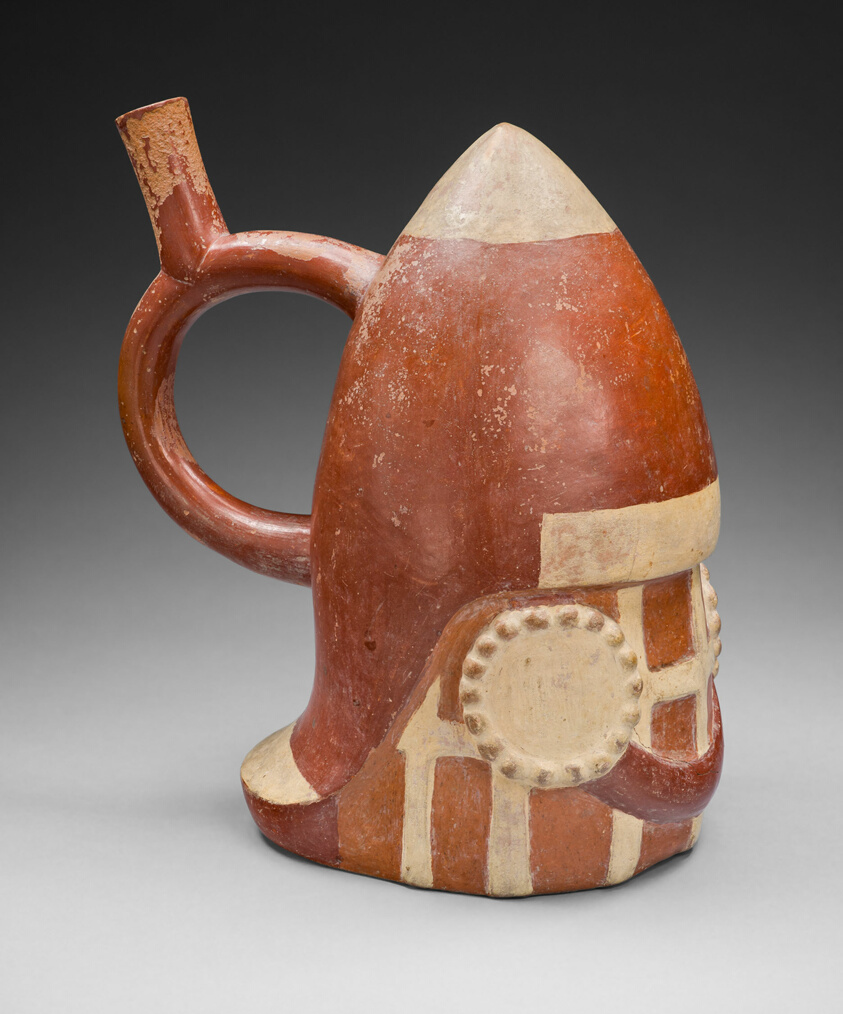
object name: Vessel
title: Vessel in the Form of a Warrior's Helmet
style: moche, mochica iii, mochica, early intermediate period, Pre-Columbian, americas, Arts of the Americas, andean, andes, south american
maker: Moche (North coast, Peru)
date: 100 BCE–500 CE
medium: Ceramic and pigment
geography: Peruvian North Coast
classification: earthenware; ceramics; vessel; art of the americas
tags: warriors, warefare